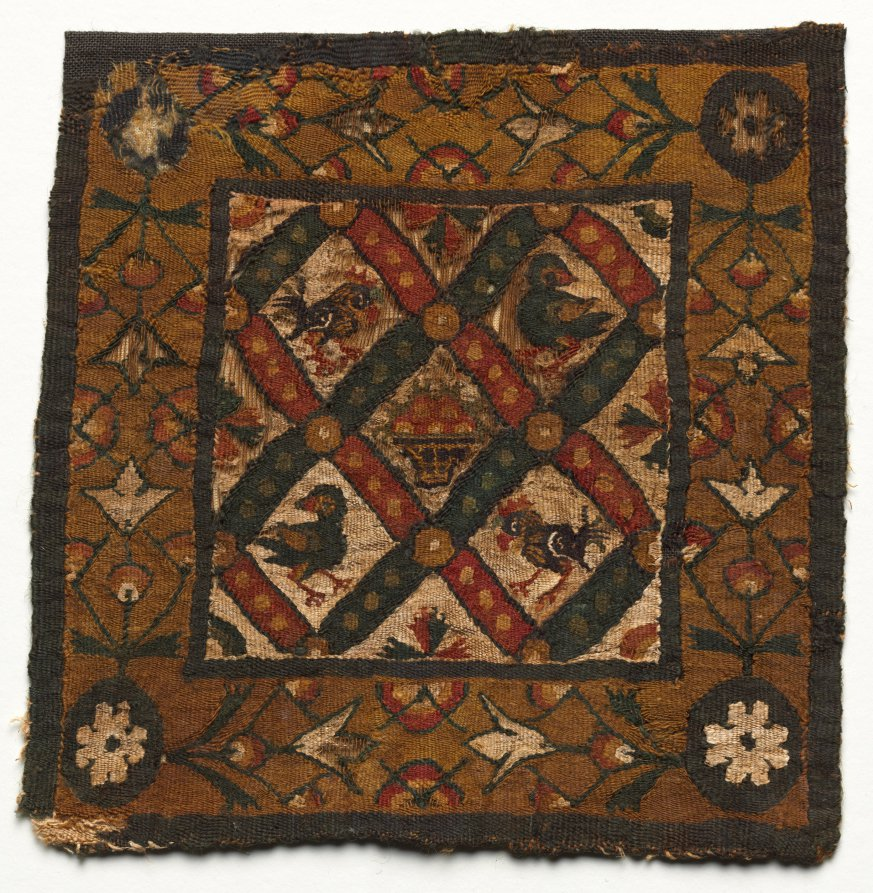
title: Square Segmentum from a Tunic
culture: Egypt, 7th - 8th century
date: 600s - 700s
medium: tapestry; linen and wool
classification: Textile